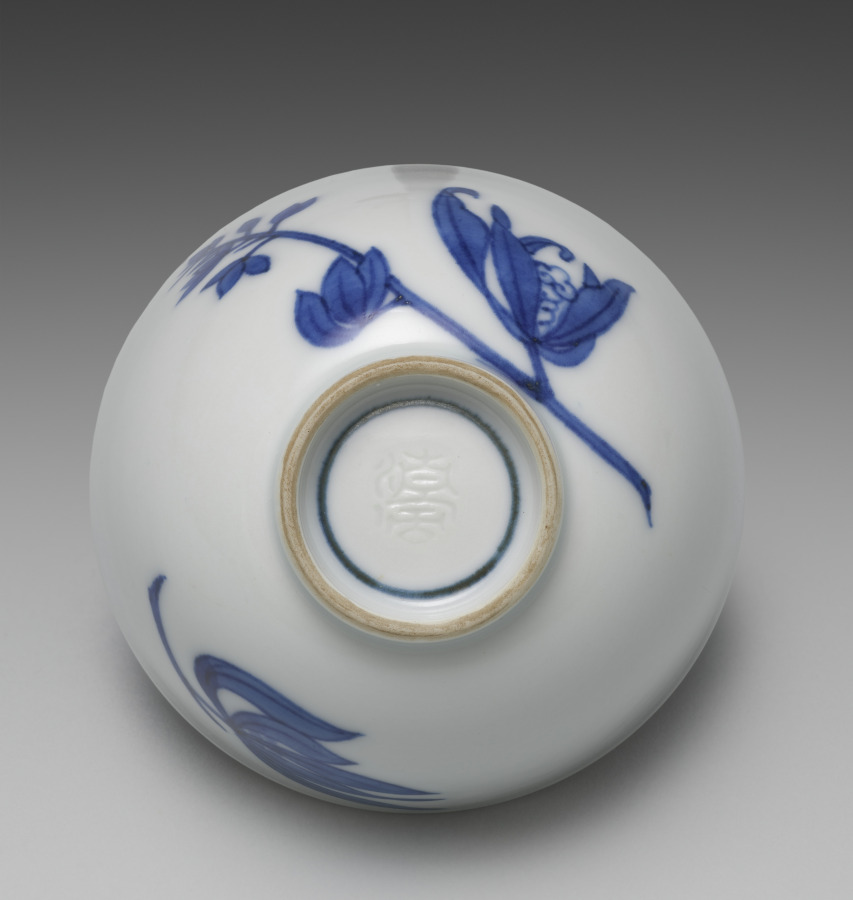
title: Teacup from Tea Set with Orchids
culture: Japan, Meiji period (1868–1912)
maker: Seifū Yohei III (Japanese, 1851–1914)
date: c. 1893–1914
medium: Porcelain with underglaze blue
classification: Ceramic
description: Although the teapot here is stored in a separate box from the five cups, these six pieces may once have been part of a tea set that included other tools such as a water cooler. The teacups have orchid flowers on both sides in underglaze blue, as well as a blue band inside the footring. The teapot has the same design and a blue band painted around the bottom of the lid’s knob. The cups’ long wood storage box is stamped on the exterior, over the lid and base, with a small red seal reading “Satō.” The same seal appears on five small squares of yellow textile, one placed in the bottom of each compartment in the teacup storage box. These are additional to the customary yellow cloths stamped with a “Seifu” seal. Interestingly, four of the Seifū cloths are stamped with an ovoid seal, while the remaining cloth, which is a slightly lighter color, has an unusual seal that is not quite gourd-shaped and with the fū of Seifū in a stylized, unrecognizable form. The teapot has its own box with a Satō seal and is wrapped with an orange textile stamped with the same unusual Seifū seal. A set with a very similar surface design is in the Brooklyn Museum. The Brooklyn set has a water cooler and a small pitcher, in addition to the teapot and cups, and all are in a single storage box. This box records the tea tools as made with kanpakuji, or “bright-jewel white porcelain,” counted among Yohei III’s most important inventions, and carved images. In fact, both sets have a white surface much closer in coloration to the cool white of porcelain clay used in Kyoto at the time, and the designs are simply painted. The Brooklyn set was thus likely mismatched at some point with a box intended for another tea set. Nonetheless, the box may have helped prevent the set’s original components from being dispersed, and the set itself provides insight into how the other tools from the present set may have looked.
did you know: This tea set with orchids has a side-handled pot called a kyūsu, used for steeping, straining, and serving tea.